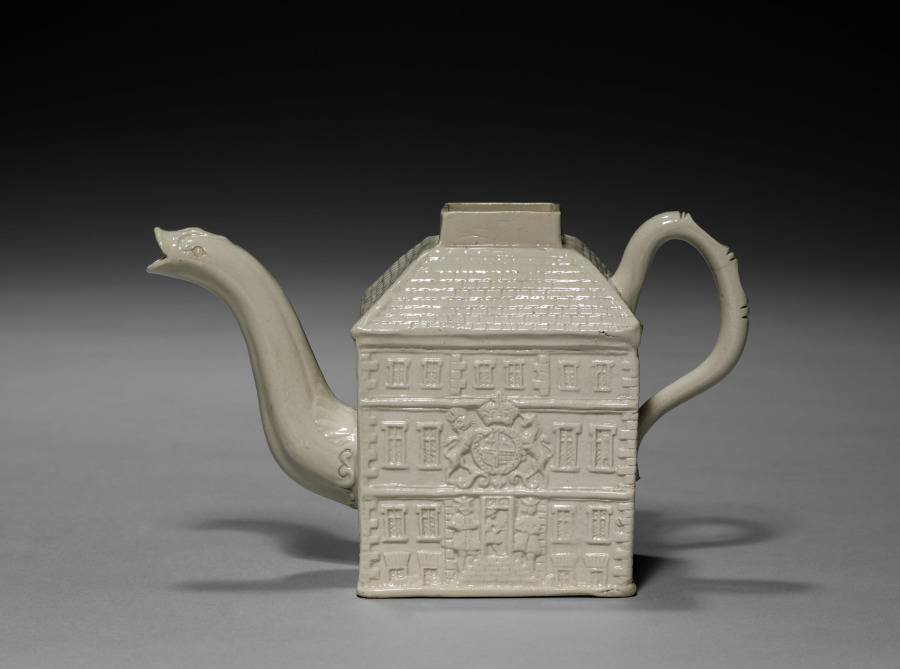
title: Teapot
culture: England, Staffordshire, 18th century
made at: Staffordshire Factory (British)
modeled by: Aaron Wood (British)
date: 1740–1750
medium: salt-glazed earthenware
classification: Ceramic